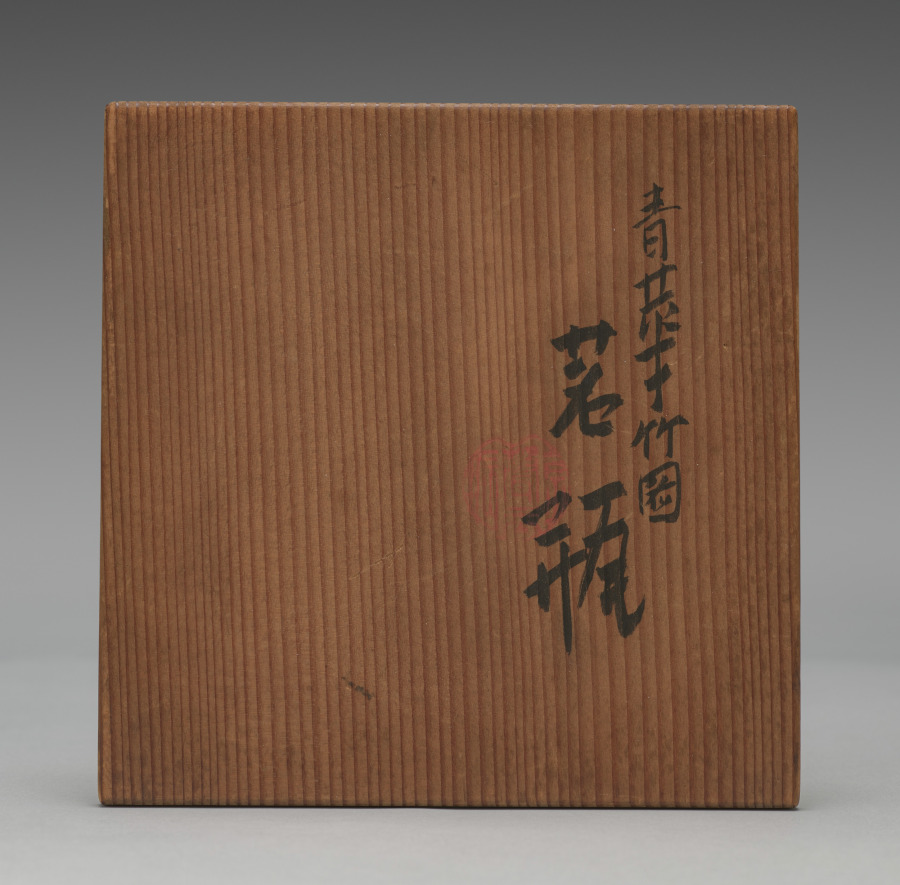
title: Teapot with Bamboo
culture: Japan, Taishō period (1912–26) or Shōwa period (1926–89)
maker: Seifū Yohei IV (Japanese, 1872–1951)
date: 1914–46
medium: Porcelain with underglaze blue, molded design and metal handles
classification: Ceramic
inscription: 清風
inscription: 清風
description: This teapot has a well-balanced design of bamboo in underglaze blue and nyoi staff-head motifs applied to both sides at the shoulder.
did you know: There is a seal on the base of the teapot.